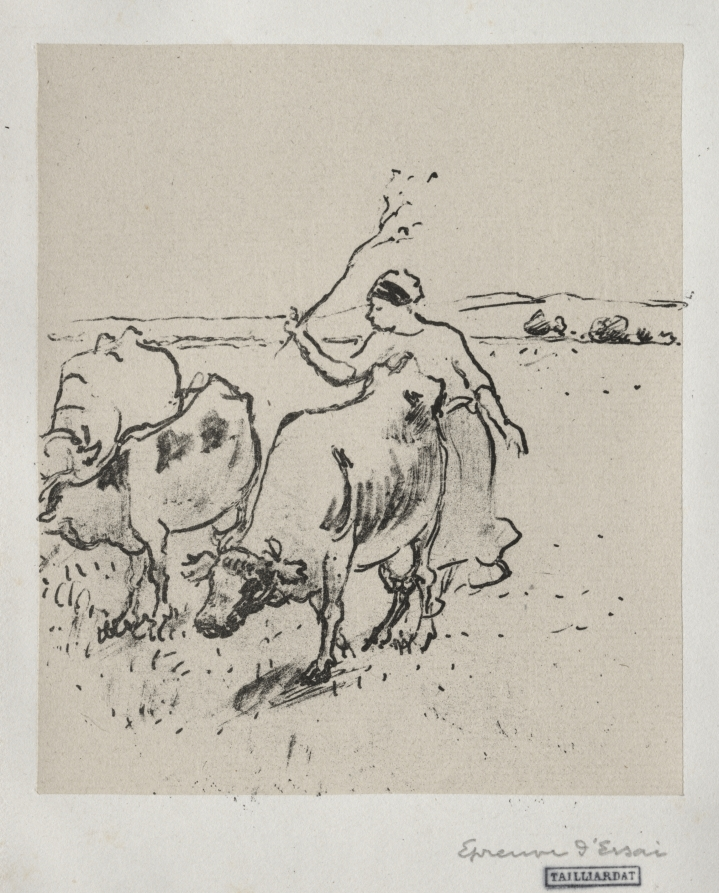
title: Cowherder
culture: France, 19th century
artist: Camille Pissarro (French, 1830–1903)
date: c. 1899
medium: Zinc lithograph with chine collé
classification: Print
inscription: Inscribed, lower right margin, in graphite: Epreuve d'Essai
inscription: Stamped, lower right margin, in black: TAILLIARDAT [Lugt 237a]